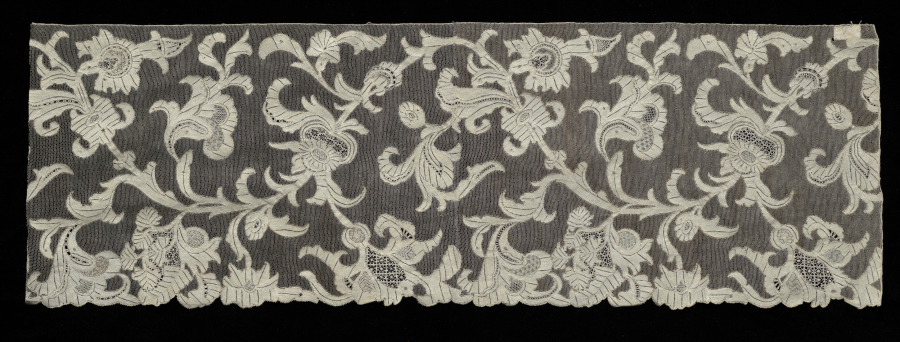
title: Lace Edging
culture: Italy, Burano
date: 1900s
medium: Linen: needle lace (Burano Point)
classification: Lace